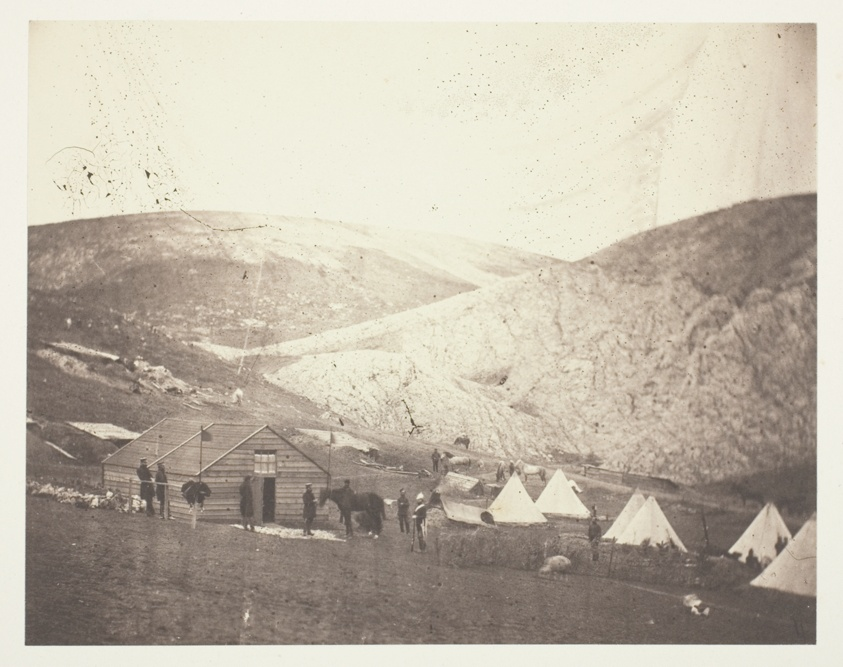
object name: Photograph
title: Camp of the 4th Dragoon Guards, near Karyni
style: 19th century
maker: Roger Fenton (English, 1819–1869)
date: 1855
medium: Salted paper print, from the album "Photographic Pictures of the Seat of War in the Crimea" (1856)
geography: England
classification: salted paper print; photographic process; photography; photograph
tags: Collected by Hugh Edwards